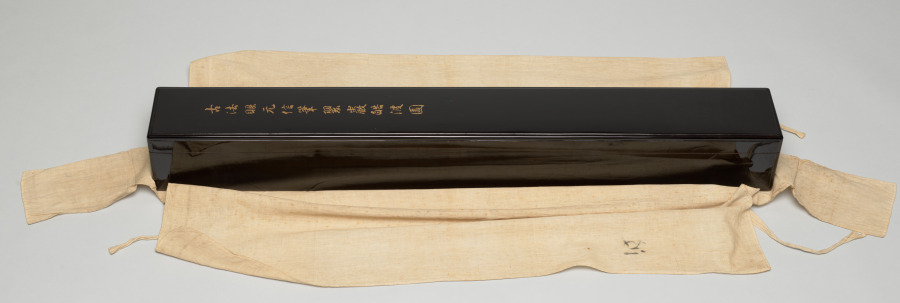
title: Rocks and Waves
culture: Japan, Muromachi period (1392–1573)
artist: attributed to Kano Motonobu (Japanese, c. 1476–1559)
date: early to mid-1500s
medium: sliding door fragment mounted as a hanging scroll; ink and gold wash on paper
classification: Painting